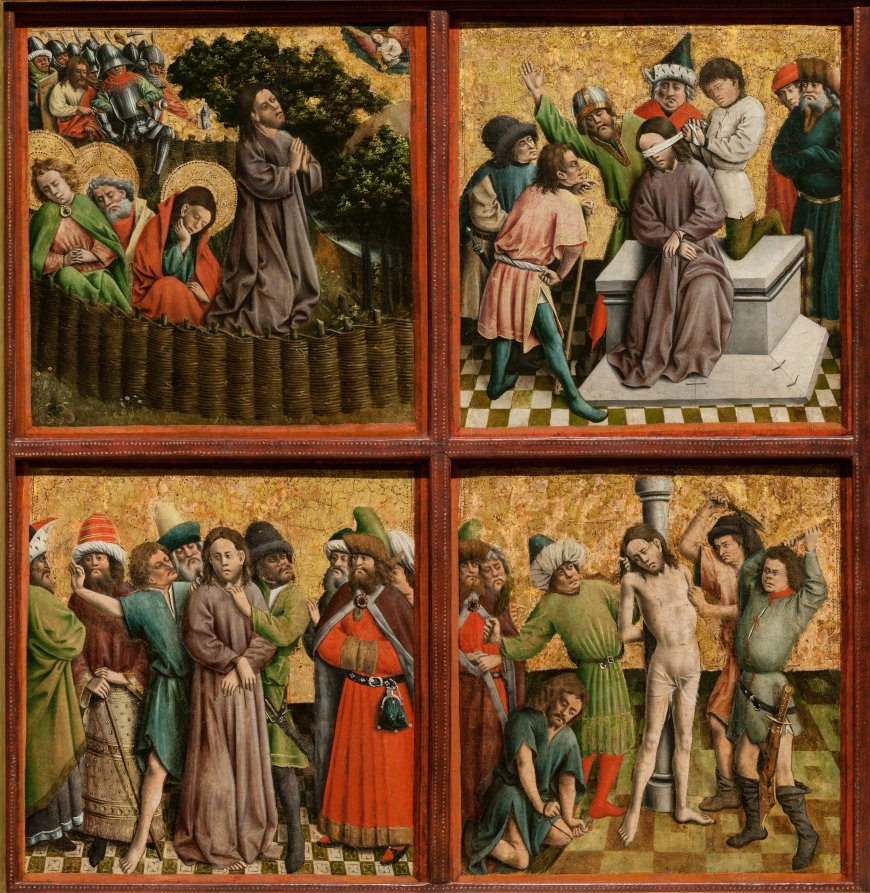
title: Altarpiece with The Passion of Christ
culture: Germany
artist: Master of the Schlägl Altarpiece (German)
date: c. 1440s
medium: oil and gold on wood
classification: Painting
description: The visual focus of this altarpiece is the suffering and death of Christ on the cross. So-called Passion cycles in art include the events leading up to and following the Crucifixion, not only as single subjects but as scenes meant to be read in sequence. Passion cycles were promoted by the two great teaching orders, the Franciscans and the Dominicans, for whom this subject represented the main religious drama of their churches, and also by the German mystics who advocated private contemplation on the humanity and suffering of Christ. The original context for this altarpiece remains unknown, but it was probably made for a religious institution in Westphalia in the Rhine Valley. During the 1870s it was given to the Abbey of Schlägl, near Linz in Upper Austria, from which both altarpiece and artist take their names. The altarpiece is not preserved today in its original format, and some of the individual scenes are missing. Scholars continue to debate the original number of scenes and their sequencing; nine of the original panels have survived.